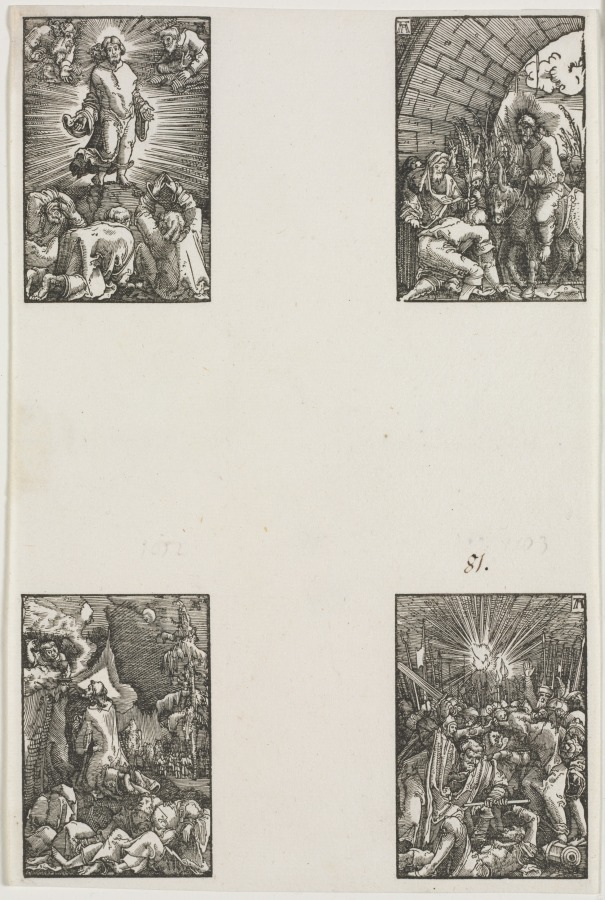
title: The Fall and Redemption of Man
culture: Germany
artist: Albrecht Altdorfer (German, c. 1480–1538)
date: c. 1515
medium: woodcut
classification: Print